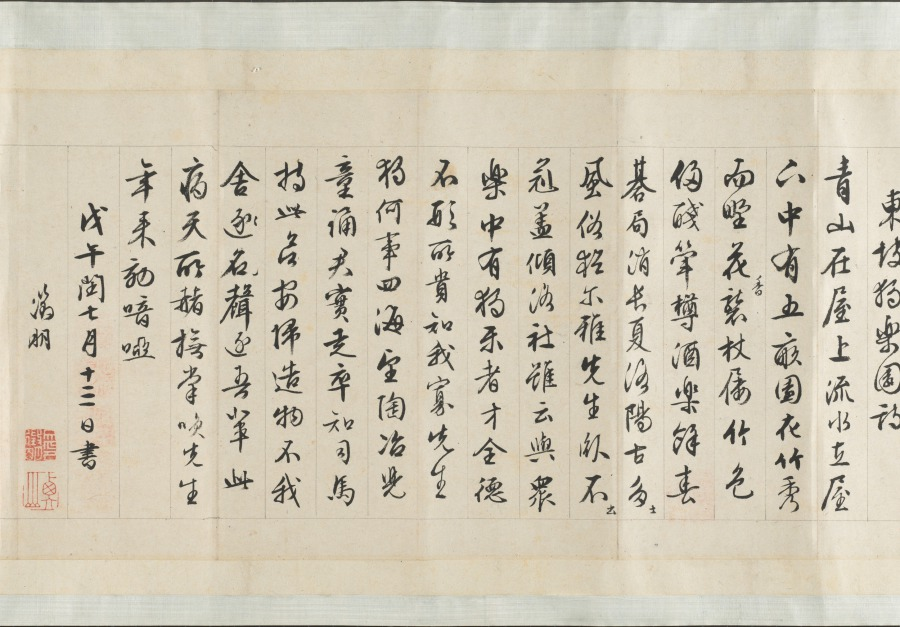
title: Garden for Solitary Enjoyment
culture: China, Ming dynasty (1368–1644)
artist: Qiu Ying (Chinese, 1494–1552)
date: 1515–52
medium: Handscroll; ink and light color on silk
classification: Painting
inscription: Accompanying text of an essay together with seven poems of Sima Guang (1019–1086) and one poem of Su Shi (1037–1101) written by Wen Zhengming (1470–1559) in 1558.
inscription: 2 colophons and 82 seals: 4 seals of Wen Zhengming 文徵明 (1470–1559); 59 seals of Xiang Yuanbian 項元汴 (1525–1590); 1 colophon, dated 1644, and 7 seals of Xiang Yukui 項禹揆 (c. late 1500s–1659); 1 colophon, dated 1880, and 2 seals of Weng Tonghe 翁同龢 (1830–1904); 2 seals of Ch'eng Chen-i (19th c.); 1 seal of Han Ch'ung (19th c.); 4 seals of Wan-go H. C. Weng 翁萬戈 (1918–2020); 3 seals unidentified.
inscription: Colophon by Xiang Yukui 項禹揆 (c. late 1500s–1659): The painting of The Garden for Self-enjoyment on the right by Shih-chou, Mr. Qiu [Qiu Ying] is in the style of Li Lung-mien. Its mood is peaceful, as if meeting the ancient gentlemen face to face among the brushes and silk; it lifts one above the sordid bustle of life. Formerly, my late father handed me this scroll which had only the painting without the written essay. I considered asking a good calligrapher to write the essay to add to it but was afraid that the quality of the writing would not match the painting. Several years later, I saw at a friend's house this essay and poems (of Ssu-ma Kuang] written by Hengshan [Wen Zhengming], once owned by my grandfather; so I spared no expense to obtain it. I rejoiced at this and said: "The divine swords are finally united. How things are pre-destined!" Now my friend Chang Kung-chao's technique for mounting [painting and calligraphy] is excellent. Therefore by daring to take them out and join them together, I can preserve this beautiful story of singular reunion. Xiang Yukui recorded at Hai-yeh-t'ang [hall] two days before New Year's Eve in the jiasheng year of the Chongzhen era [1644]. trans. LYSL/HK/WKH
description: Garden of Solitary Enjoyment refers to a site built in 1073 by the statesman Sima Guang (1019–1086) after he had retired to Luoyang, Henan province. Every spring, visitors would flock to his garden. Each of its seven structures references a historic figure. Sima wrote: I channel streams [like Du Mu], to water flowers [like Bai Juyi], or trim bamboo [like Wang Huizhi]. . . . I know of no joy between heaven and earth that could take its place. Qiu Ying’s painting, created after an 11th-century version of the same theme, must have appealed to garden owners of the Ming dynasty, since it became the template for numerous Suzhou workshop copies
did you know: Sima Guang completed his monumental survey of Chinese history, Zizhi tongjian, in the garden depicted in this painting.